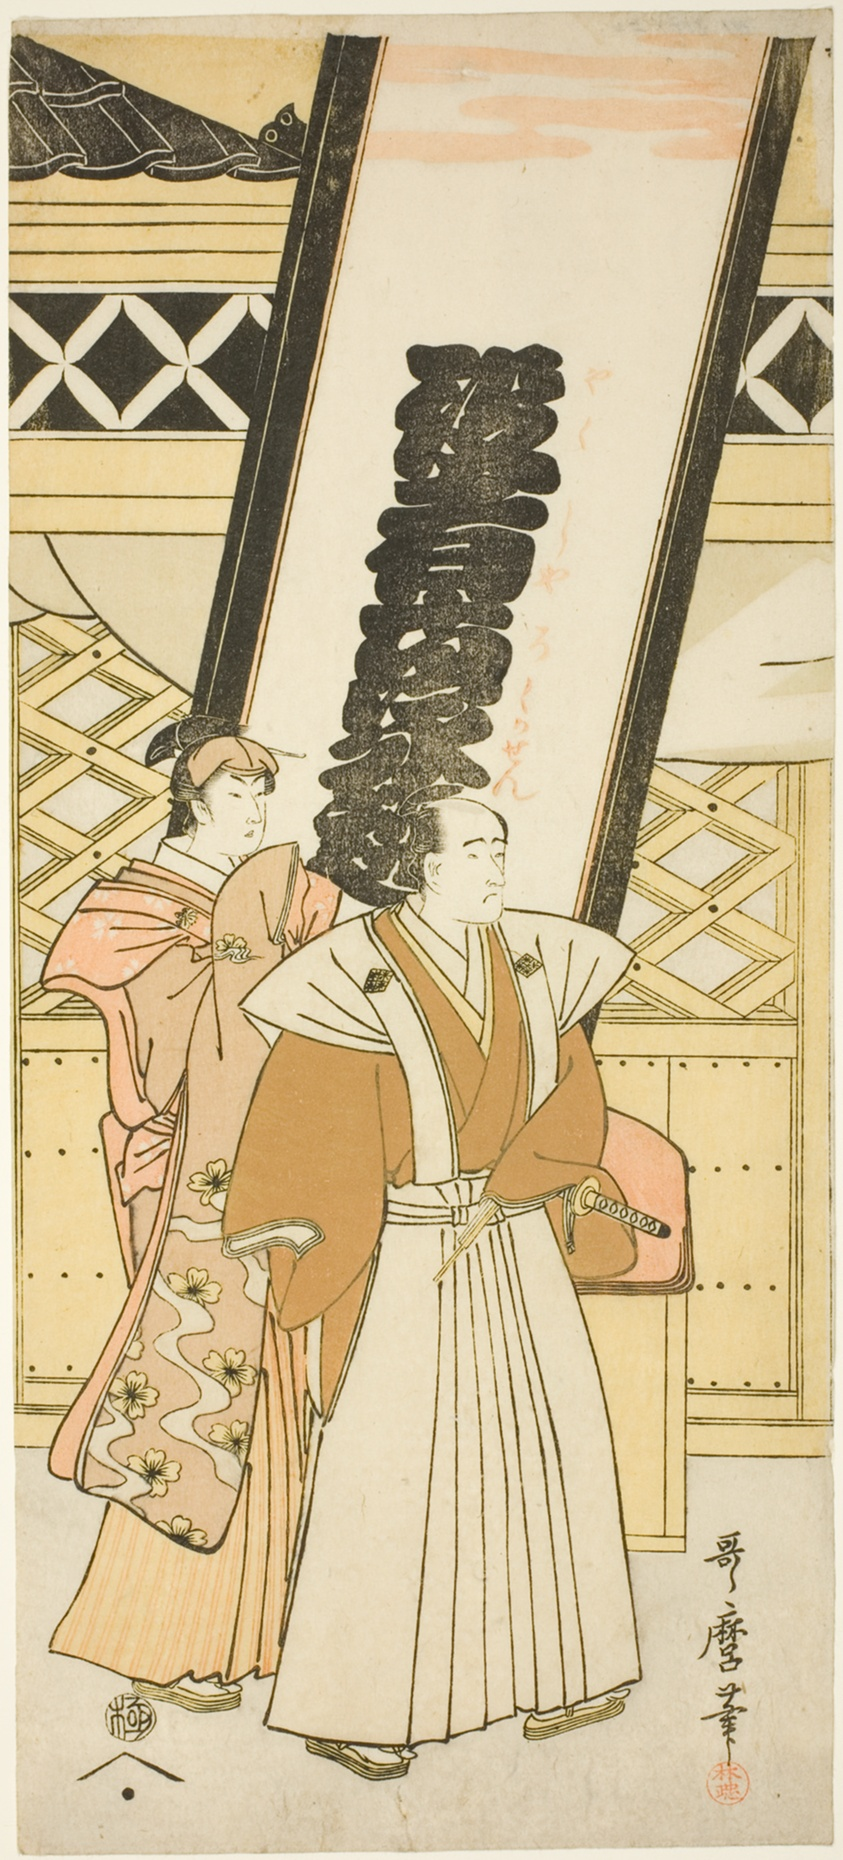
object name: Print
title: Matsumoto Koshiro IV and Nakayama Tomisaburo, the left hand sheet of a triptych entitled “Six Actors Likened to the Immortal Poets" ("Yakusha Rokkasen")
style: Japanese (culture or style)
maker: Kitagawa Utamaro 喜多川 歌麿; Japanese, 1753 (?)-1806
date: c. 1784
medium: Color woodblock print; hosoban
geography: Japan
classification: woodblock print; print; asian art